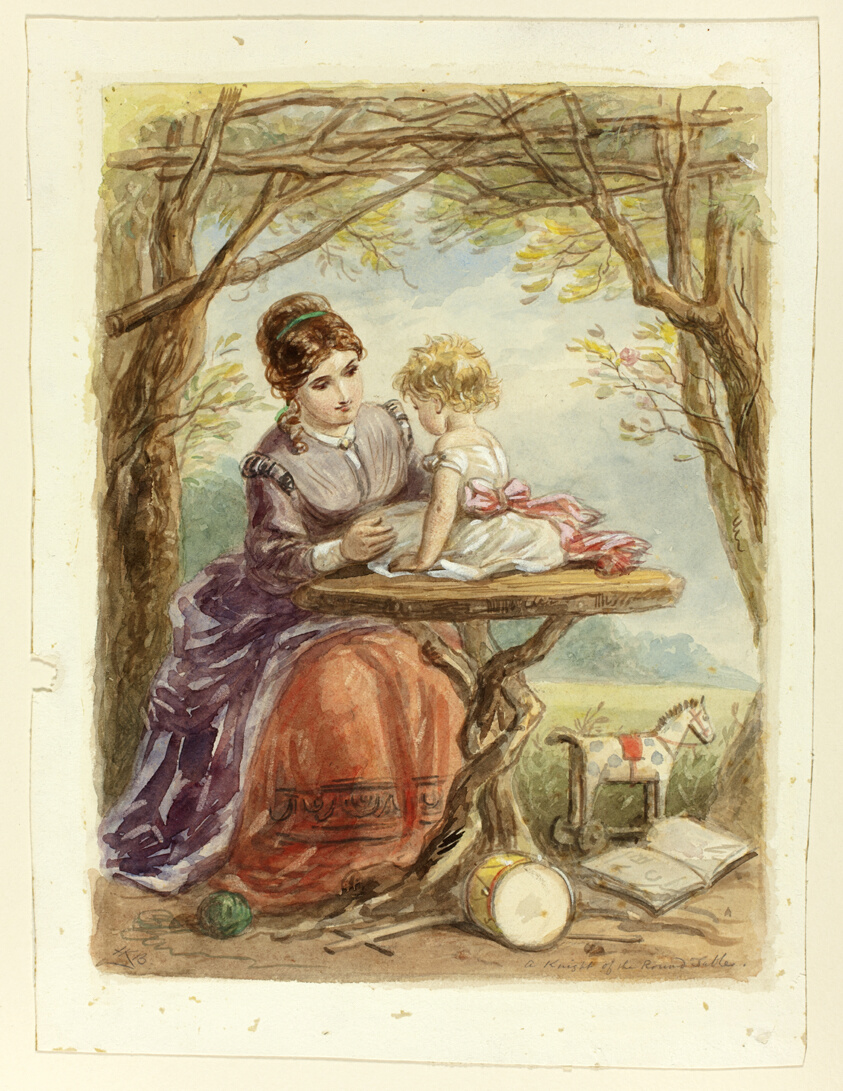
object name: Drawing and Watercolor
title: A Knight of the Round Table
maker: Hablot Knight Browne (English, 1815-1882)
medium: Watercolor, with touches of green and pink gouache, heightened with white gouache, on ivory wove paper, laid down on cream wove paper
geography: England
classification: watercolor; drawings (visual works); prints and drawing